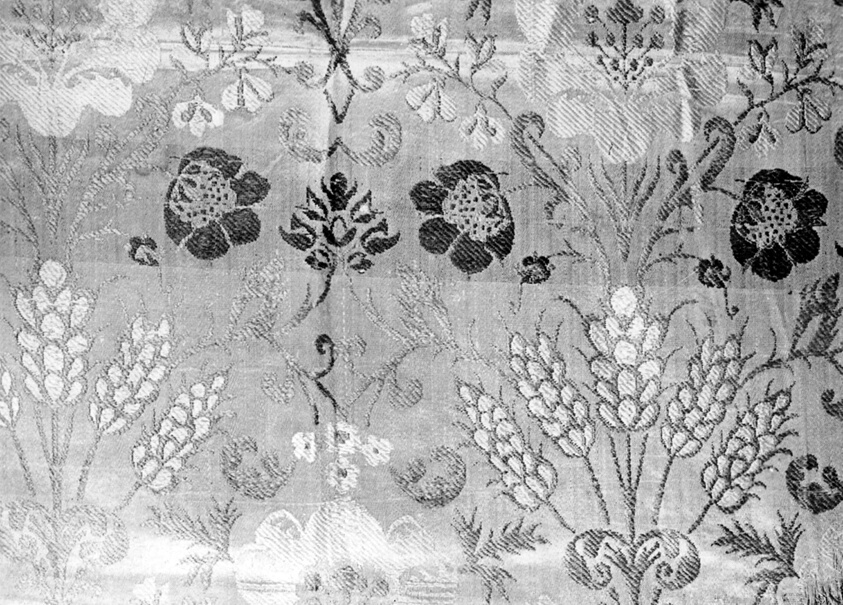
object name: Textile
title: Panel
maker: England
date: 1801/25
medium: Silk, warp-float faced satin weave self-patterned by areas of twill interlacing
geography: England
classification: textile; weaving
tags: flowers